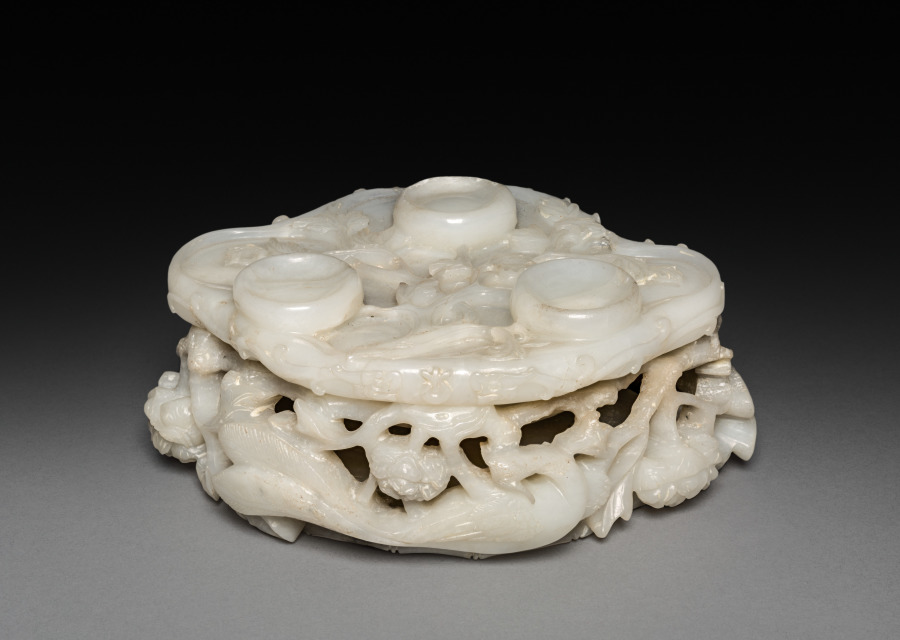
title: Three-Sectional Altar Group: Koro with Lid and Base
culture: China, Qing dynasty (1644-1911)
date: 1644–1911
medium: jade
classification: Jade